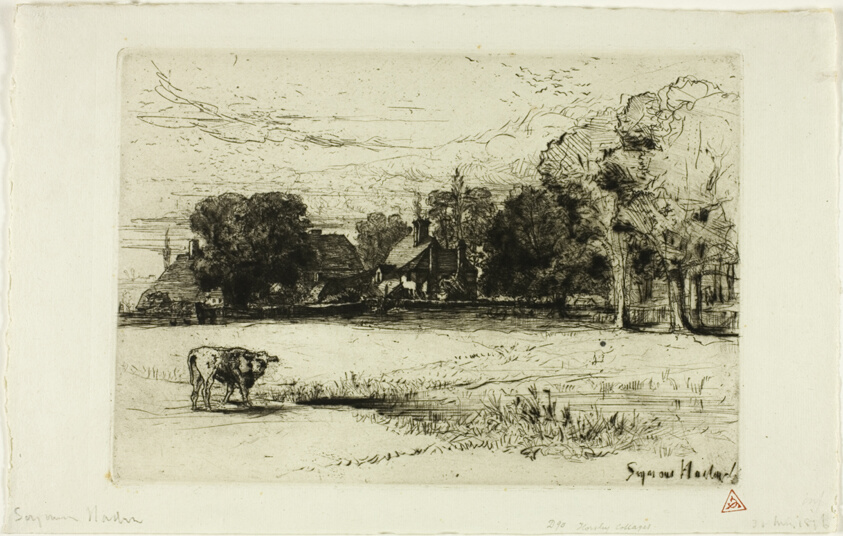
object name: Print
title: Horsley's Cottages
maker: Francis Seymour Haden (English, 1818-1910)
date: c. 1865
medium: Etching on zinc printed on ivory laid paper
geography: England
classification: etching; print; prints and drawing